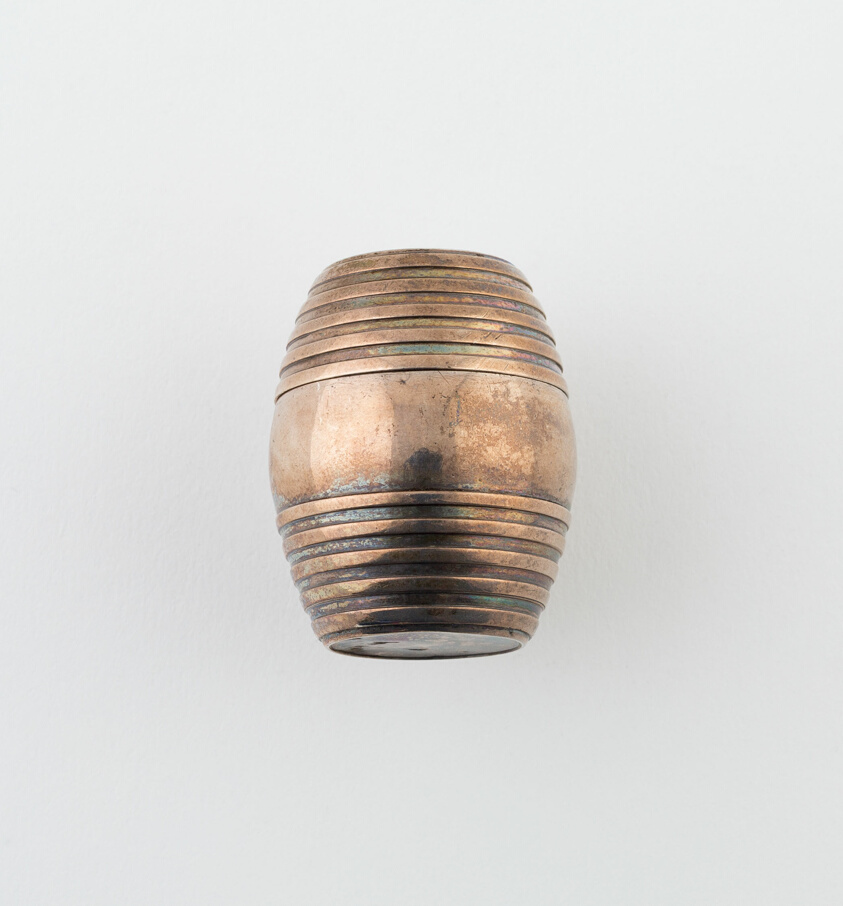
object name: Metalwork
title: Barrel-Shaped Nutmeg Grater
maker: Possibly Denmark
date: c. 1830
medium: Silver and iron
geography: Denmark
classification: container for personal use; box; european decorative arts; metalwork; silver; decorative object/ornament